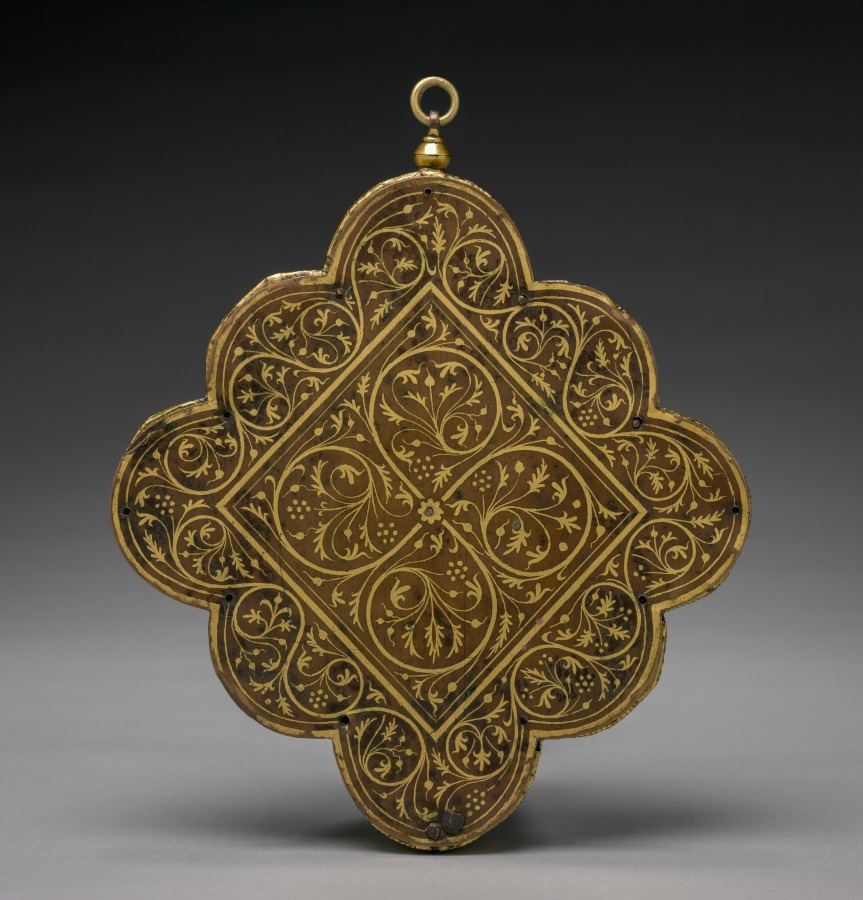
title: Pendant with the Virgin and Child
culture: Mosan, Meuse Valley, Romanesque period, 12th century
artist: circle of Godefroid de Huy (Netherlandish)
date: c. 1160–1170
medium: gilded copper, champlevé enamel; the reverse decorated in vernis brun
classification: Enamel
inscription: S[AN]C[T]A MARIA MATER D[OMI]NI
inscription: HVMILITAS; VIRGINITAS; MISERICORDIA; PIETAS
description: This pendant was made in the Rhine-Meuse region—now in modern Belgium—renowned for the production of fine metalwork objects, especially enamels. An enamel plaque depicting the enthroned Virgin and Christ child dominates the pendant. Four peripheral enamels depict angelic figures representing virtues: Humility, Virginity, Piety, and Mercy, each identified by an inscription. The pendant may have been made to serve as a reliquary to house a consecrated host. The refined craftsmanship and costly materials fittingly honor these sacred remains.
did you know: The outer lobes contain cabochons, gemstones that have been shaped and polished resulting in a rounded top and flat bottom, of garnet, glass, and quartz.